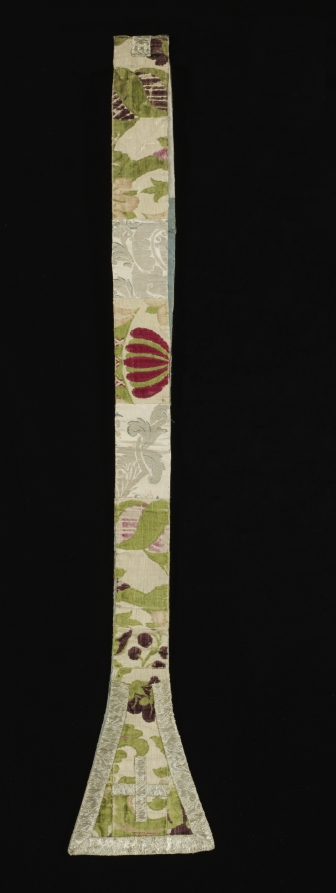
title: Stole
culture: Italy, Genoa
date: 1600s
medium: Velvet: cut and uncut, silk, metal thread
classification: Velvet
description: This sumptuous polychrome velvet displays a central vase with abundant flora and exotic leaves flanking curving blossoming fronds on a gilt-metal thread ground. The pattern was created with five colors of cut and uncut (loops) velvet pile. Only the pile warps for the lush green velvet occur across the entire cloth, while each additional color appears in vertical stripes—crimson, peach, rose, and purple. These widely acclaimed velvets from Genoa were the most colorful woven in Europe. Both the long stole and the shorter maniple are insignia of the office of deacons, priests, and the higher clergy. The stole was worn under a chasuble according to the office and the maniple was hung on the left forearm. The burse is a stiff receptacle in which the folded corporal, a white linen cloth on which the sacred bread and chalice are placed during the Mass, is carried to and from the altar. The upper fabric matches the chasuble, the bottom is a plain silk, and the interior has an obligatory linen lining.